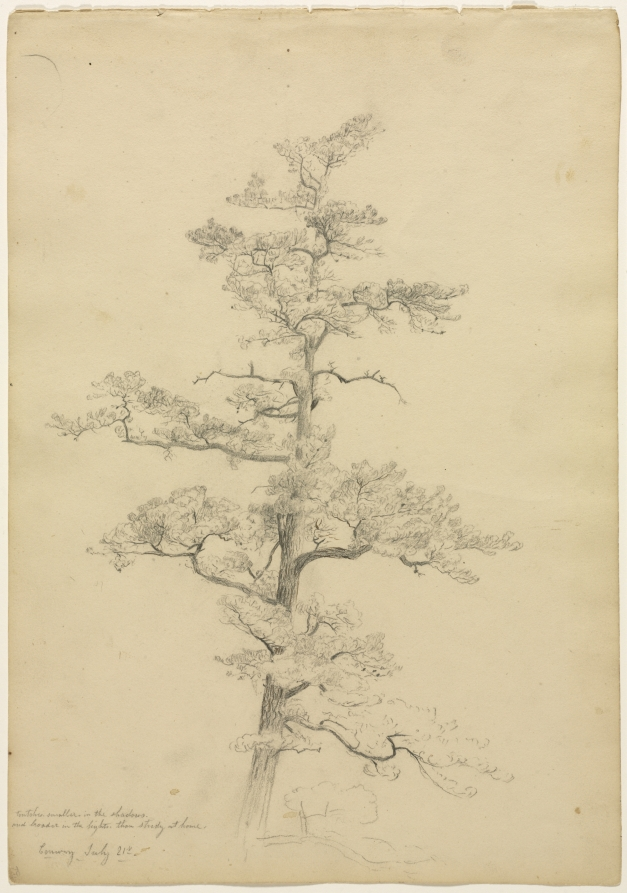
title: Pine Tree, Conway, New Hampshire (recto)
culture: America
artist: David Johnson (American, 1827–1908)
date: c. 1851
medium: graphite with pen and brown ink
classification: Drawing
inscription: by artist, in graphite, ll: toutches. [sic] smaller in the shadows. / and broader in the lights. than study at home. / Conway July 21s [fragmentally underlined]